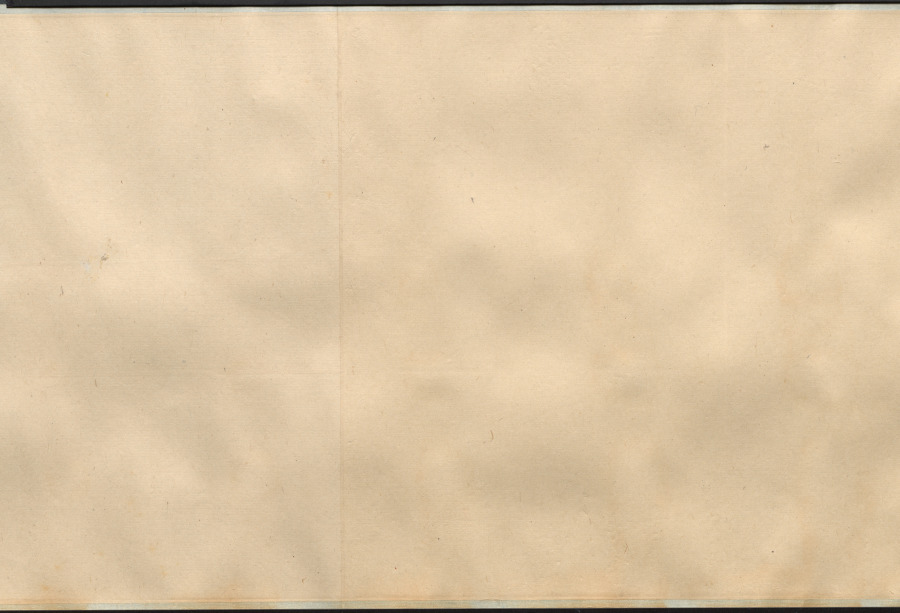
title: Rocks, Orchid, and Bamboo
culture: China, Qing dynasty (1644-1911)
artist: Shitao (Chinese, 1642–1707)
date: 1662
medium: handscroll; ink on paper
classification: Painting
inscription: Title colophon in four characters with signature and two seals on gold-flecked paper.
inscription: Artist's signature, inscription (with date of 1662), five seals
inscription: Colophon with two seals.